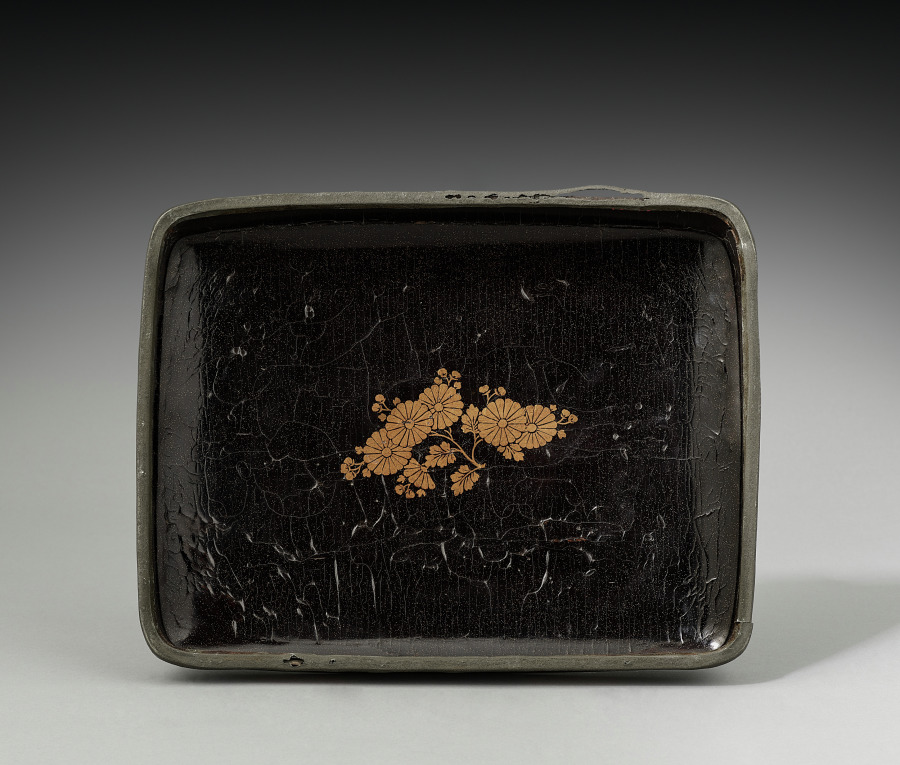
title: Cosmetics Box with Chrysanthemums (lid)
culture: Japan, Kamakura period (1185–1333)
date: early 1300s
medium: lacquer on wood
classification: Lacquer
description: In China, the chrysanthemum was historically appreciated for its association with the Double Nine Festival and the reclusive life of the poet Tao Yuanming (AD 365-427). In Japan, the 16-petaled chrysanthemum came to symbolize the Japanese imperial family after Emperor Gotoba (1180-1239) chose the motif as his personal emblem, having it applied to his sword and everyday utensils. This box proves that the flower also appeared on lacquer wares as early as the Kamakura period.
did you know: In Japanese, this type of small box is called a tebako, literally a hand box, and was typically part of a cosmetics set.